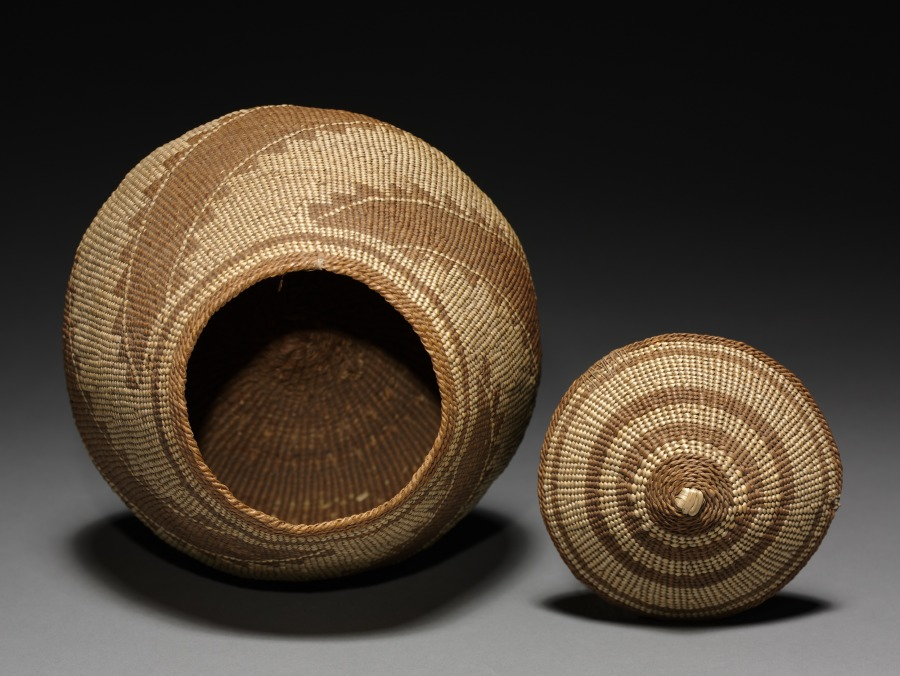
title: Tobacco Basket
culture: California, Yurok, late 19th century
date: c 1875– 1900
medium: twined grasses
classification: Basketry